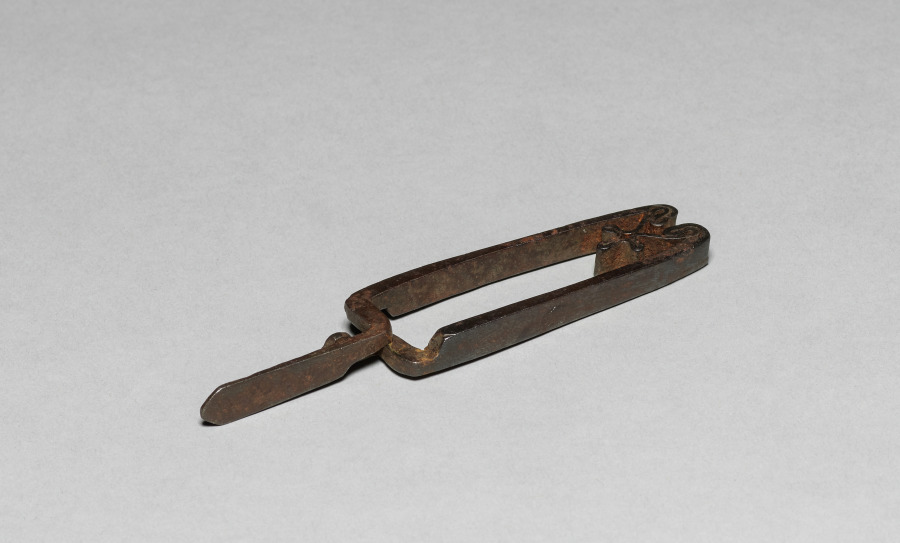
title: Tweezers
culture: Europe, 17th century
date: 1600s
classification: Tool